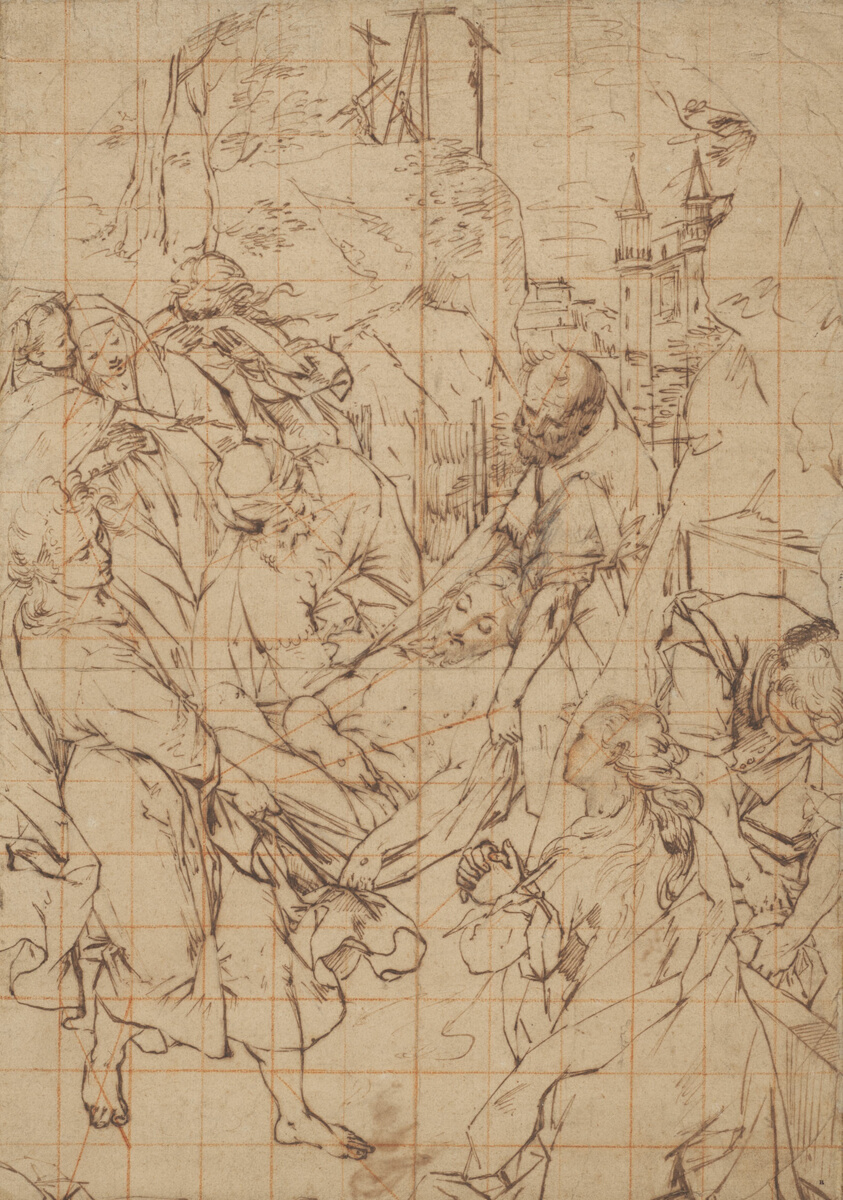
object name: Drawing and Watercolor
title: The Entombment of Christ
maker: Federico Barocci (Italian, c. 1535-1612); or follower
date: 1579/93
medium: Pen and brown ink, with touches of graphite and a later (?) addition of gray wash to head of Christ, on buff laid paper, squared in red chalk, laid down on cream laid paper, laid down on tan wove paper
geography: Italy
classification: pen and ink drawings; drawings (visual works); prints and drawing